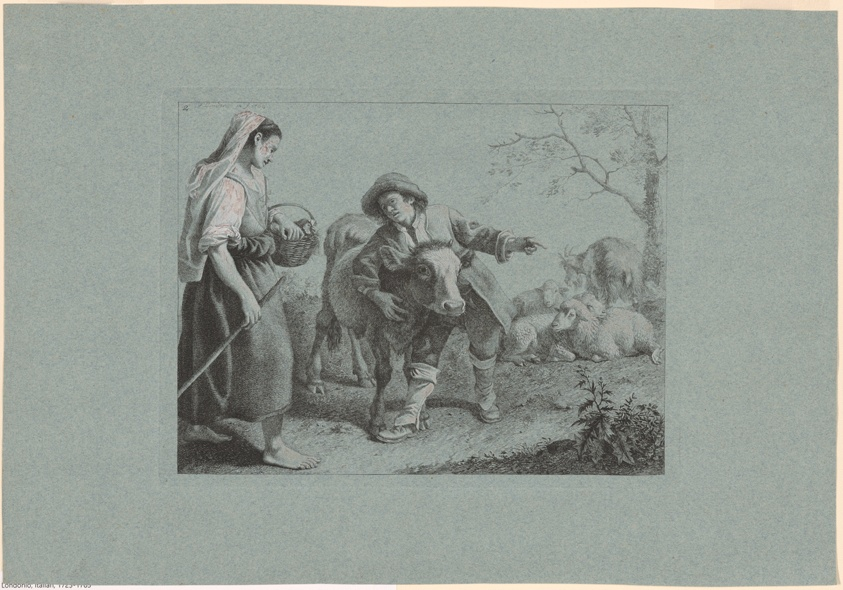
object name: Print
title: Plate 2, from The Set of 12 Pastorals Scenes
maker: Francesco Londonio (Italian, 1723-1783)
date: 1762-63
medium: Etching in black, with white opaque watercolor on blue wove paper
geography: Italy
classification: etching; paper; print; prints and drawing